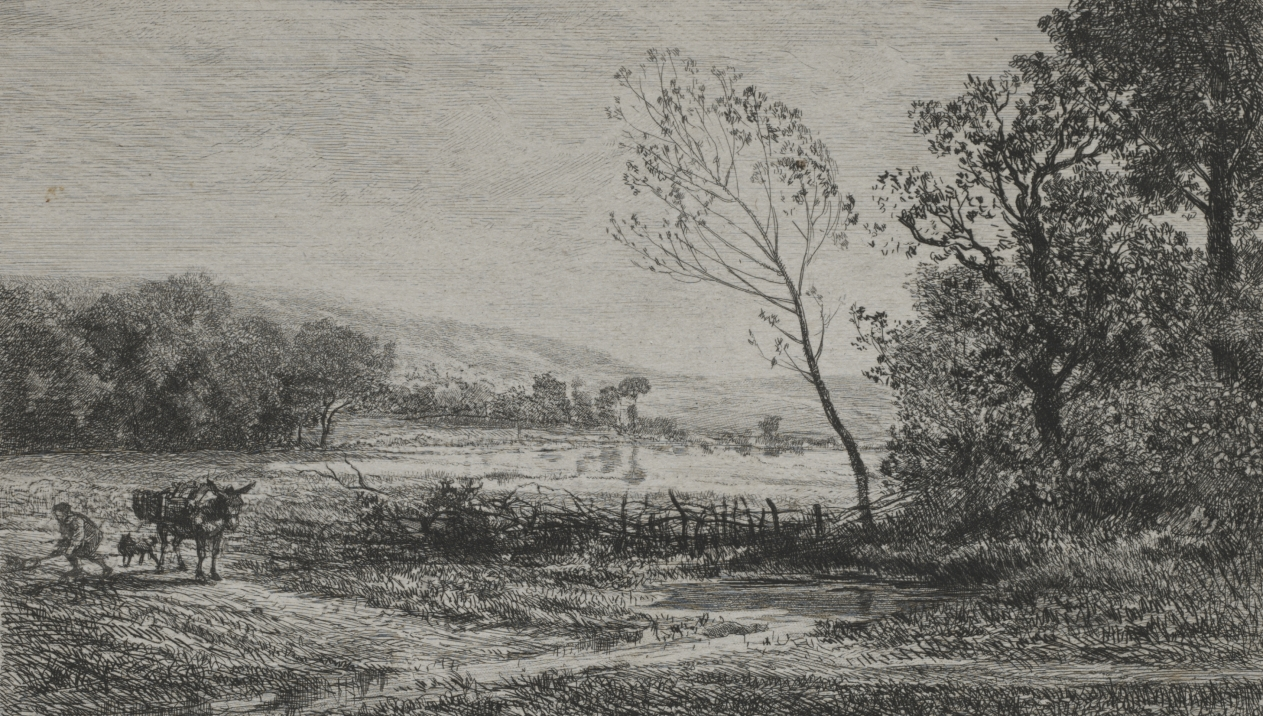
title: Autumn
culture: France, 19th century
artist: Charles François Daubigny (French, 1817–1878)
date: 1848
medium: etching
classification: Print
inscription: signed, lower left, in plate: Daubigny